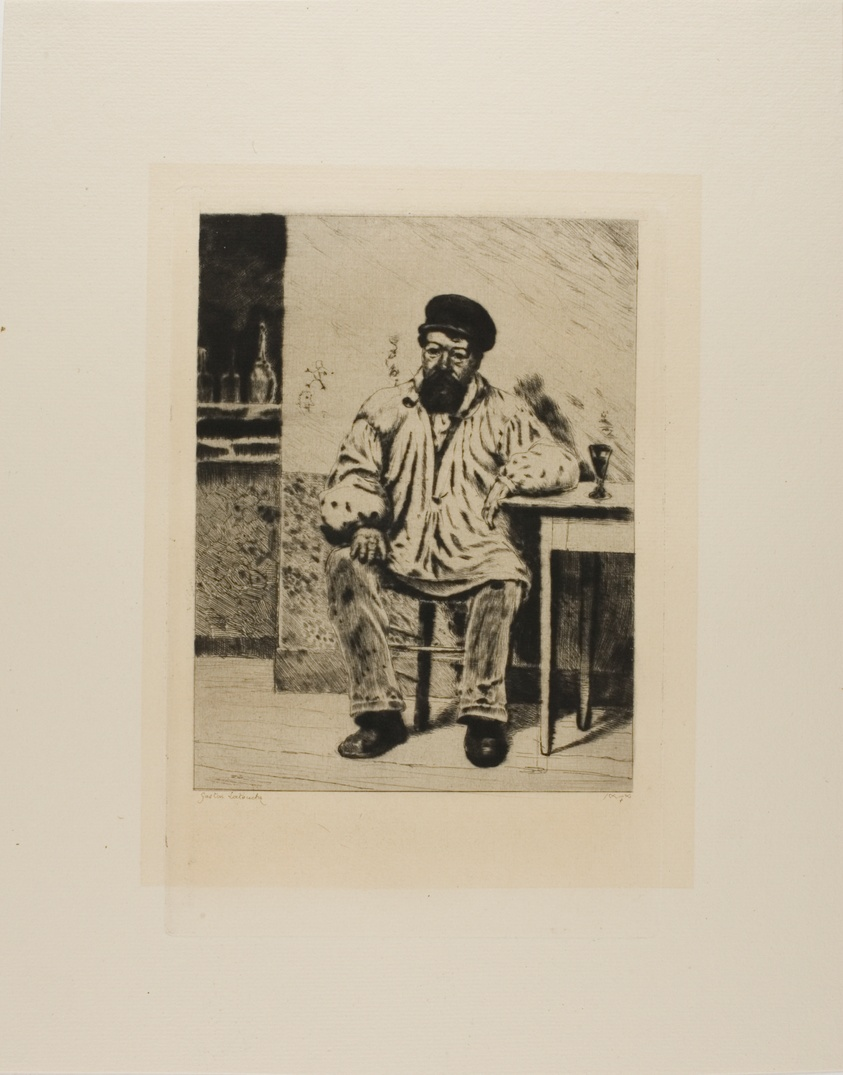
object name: Print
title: Plate from l'Assommoir (bearded man seated at table)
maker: Gaston La Touche (French, 1854-1913)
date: 1878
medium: Drypoint and plate tone on ivory laid paper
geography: France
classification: drypoint; print; prints and drawing